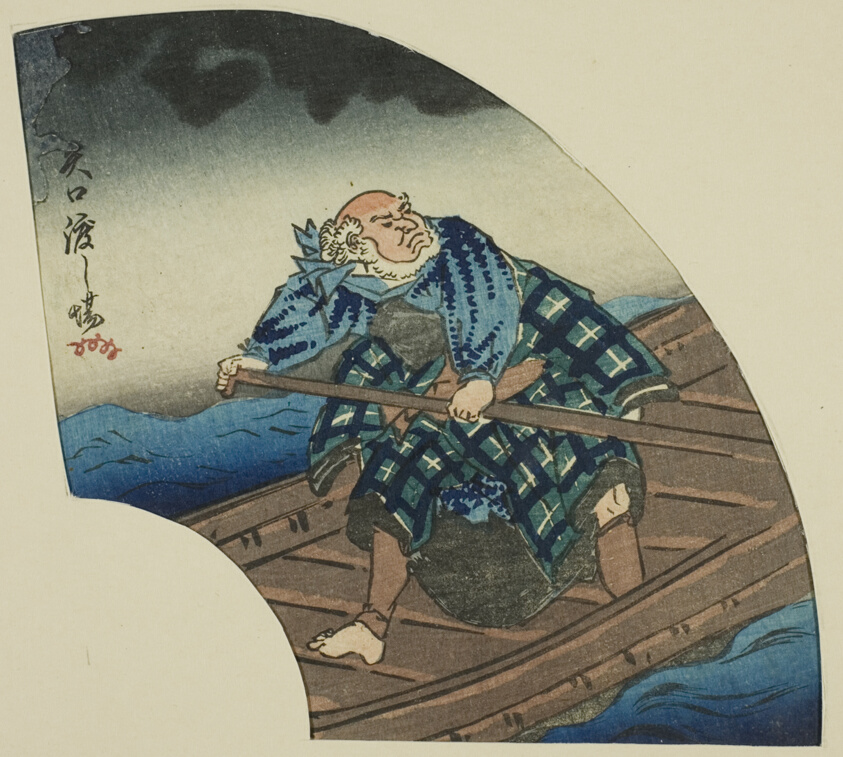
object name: Print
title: Yaguchi Ferry Crossing (Yaguchi no watashiba), section of a sheet from the series "A Harimaze Mirror of Joruri Plays (Harimaze joruri kagami)"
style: Japanese (culture or style)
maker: Utagawa Kuniyoshi (Japanese, 1787-1861)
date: 1854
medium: Color woodblock print; section of harimaze sheet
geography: Japan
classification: woodblock print; print; asian art